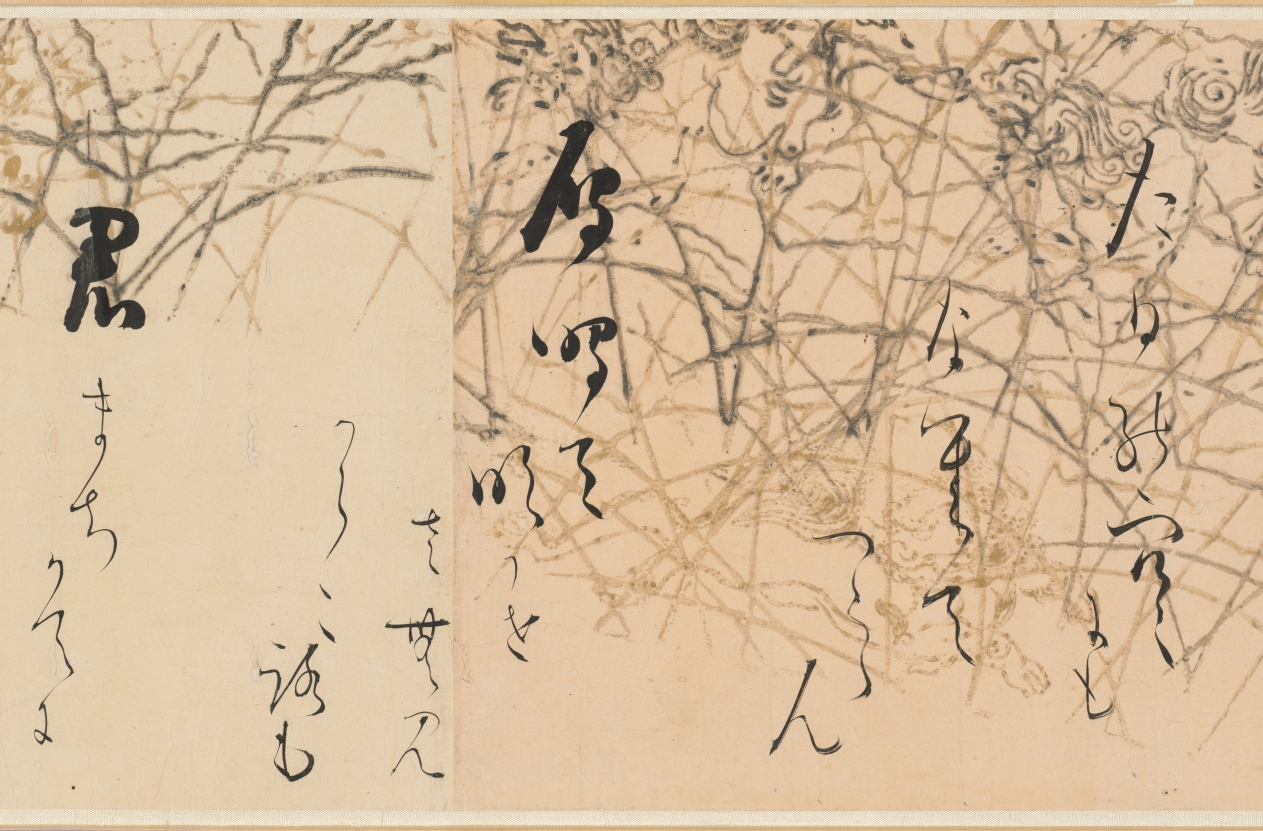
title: Selections from the New Collection of Japanese Poems from Ancient and Modern Times (Shinkokin wakashū) with Printed Designs of Chinese Lions and Crab Finger Grass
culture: Japan, Edo period (1615–1868)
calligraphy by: Hon'ami Kōetsu (Japanese, 1558–1637)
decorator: Tawaraya Sōtatsu (Japanese, c. 1570–c. 1640)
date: early 1600s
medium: handscroll; ink, gold, and silver on paper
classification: Calligraphy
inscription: Seal: 光悦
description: Hon’ami Kōetsu was a calligrapher and craftsman who frequently collaborated with the painter Tawaraya Sōtatsu, considered the first master of the Rinpa school. Kōetsu brushed seven poems from the autumn section of a poetry anthology onto dyed paper with motifs designed and printed in gold and silver by Sōtatsu.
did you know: Before becoming a master painter of screens, Tawaraya Sōtatsu painted fans.